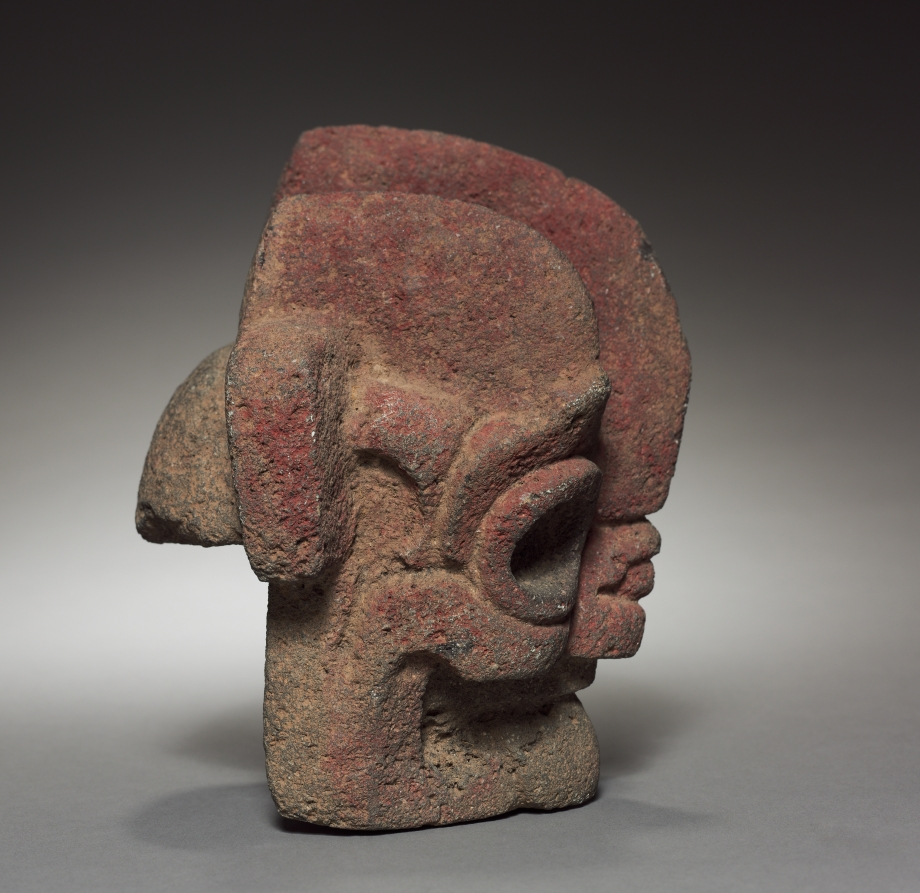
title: Head Hacha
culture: Mexico, Veracruz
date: 300–900 CE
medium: gray volcanic stone with red pigment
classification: Sculpture